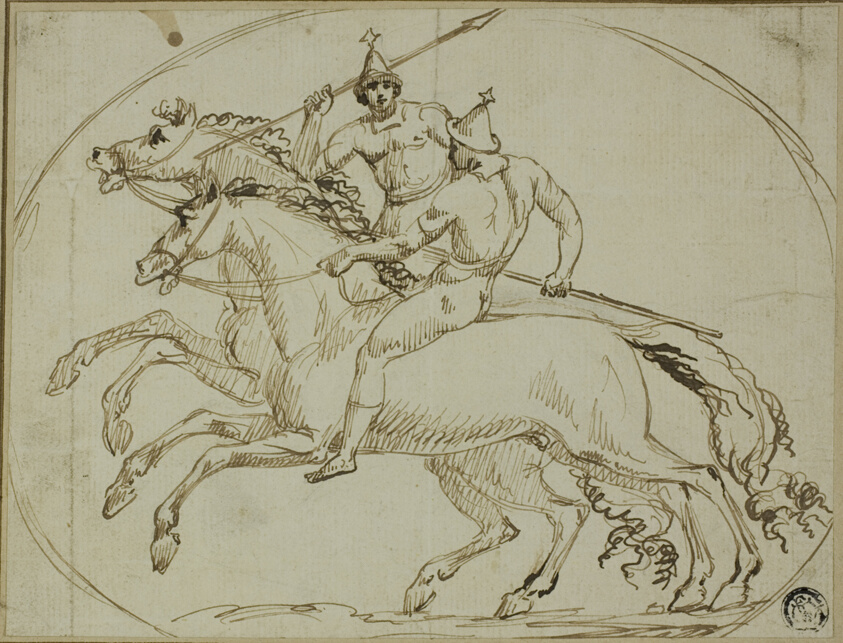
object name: Drawing and Watercolor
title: Two Mounted Warriors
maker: Attributed to John Deare; English, 1759-1798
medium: Pen and brown ink, on ivory laid paper, laid down on tan wove paper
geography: England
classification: drawings (visual works); prints and drawing